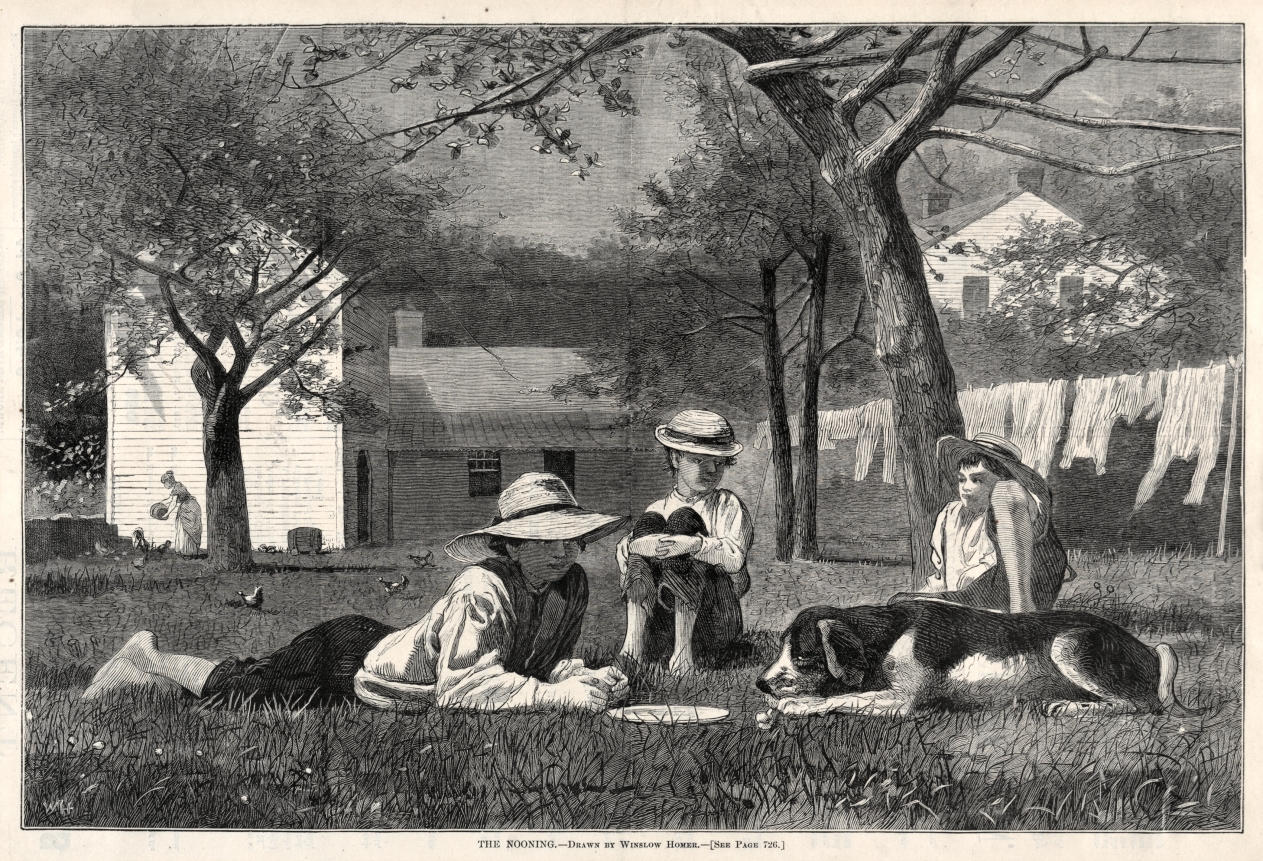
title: The Nooning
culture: America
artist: Winslow Homer (American, 1836–1910)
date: 1873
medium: wood engraving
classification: Print